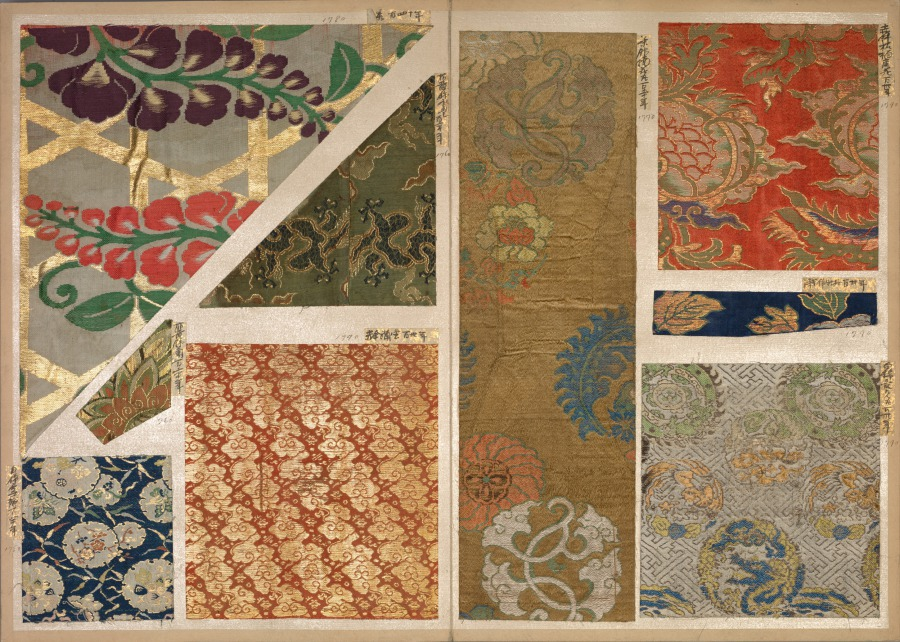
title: Album of Textile Samples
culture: Japan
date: 1790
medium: silk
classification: Textile